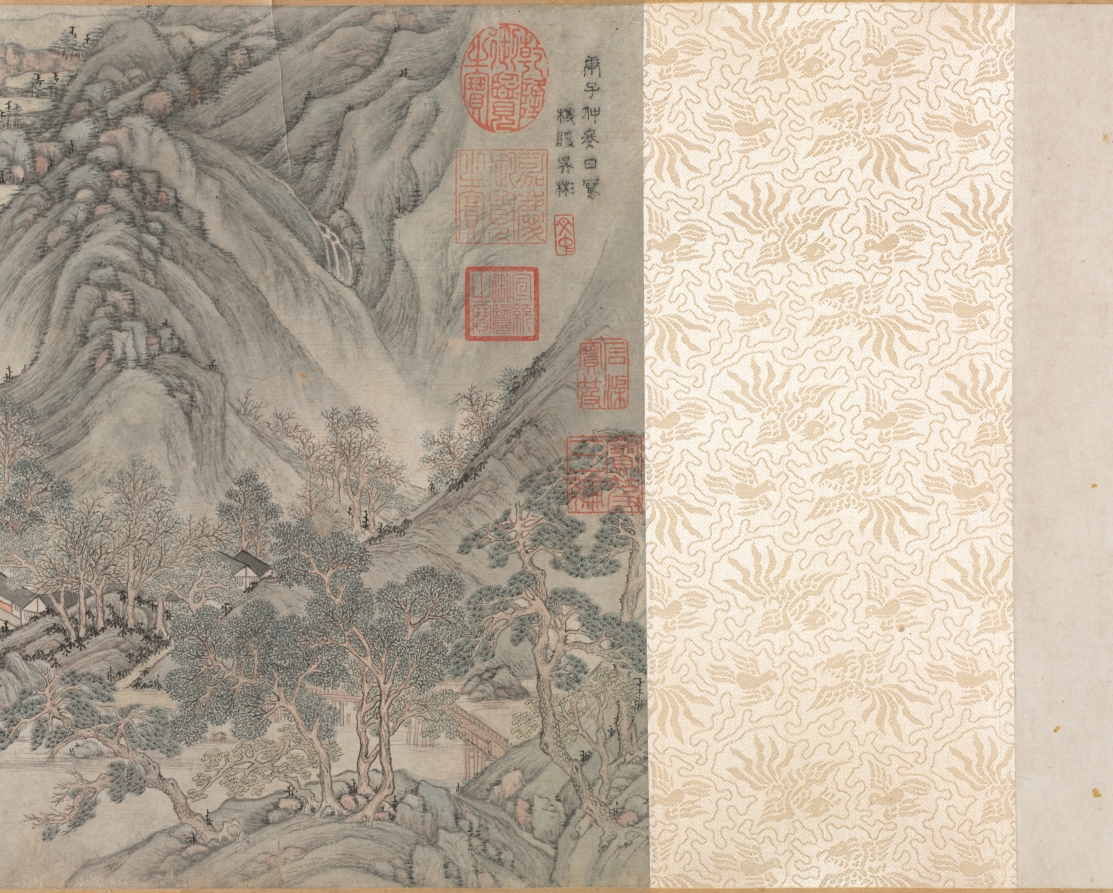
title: Greeting the Spring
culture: China, Ming dynasty (1368–1644)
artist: Wu Bin (Chinese, active c. 1591–1626)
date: 1600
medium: handscroll; ink and light color on paper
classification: Painting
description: This masterfully composed landscape in light colors and delicate brushwork is an image of the water-rich Jiangnan region in southeast China, where Wu Bin was active as an artist. Embedded in rolling hills along lakesides and streams nestle cityscapes hosting numerous spring festivities. Lantern displays and street performances in the villages salute the New Year, and are interwoven with scenes of farming, fishing, and silk making. In one scene in the middle ground, an ox made of clay under a canopy is lead in a procession to an architectural compound, a ceremony known as whipping the spring ox in hope for a good harvest. This handscroll bears five collector seals by the Qianlong emperor indicating his appreciation for the painting.